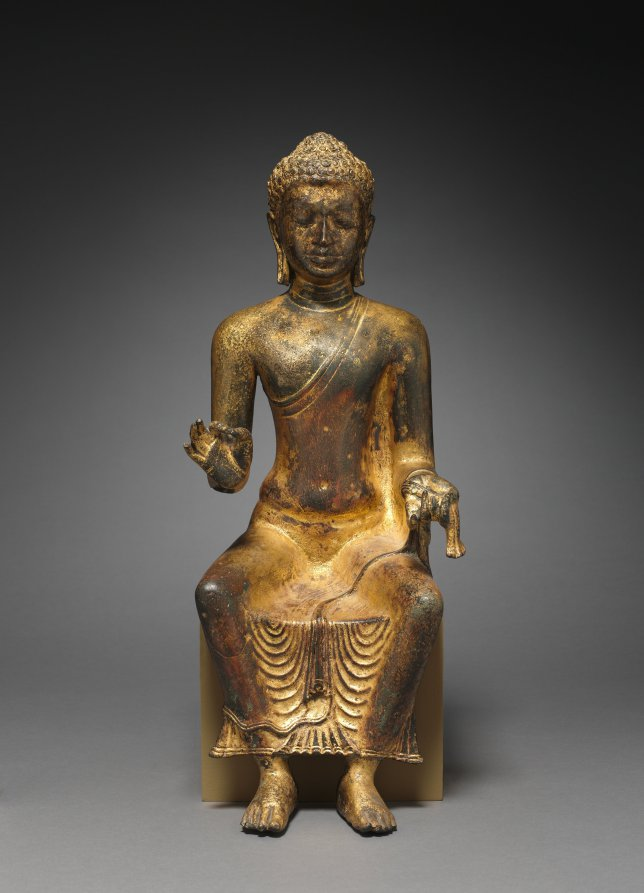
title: Enthroned Buddha Preaching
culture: Myanmar or Thailand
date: 700s–800s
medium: copper alloy with gilding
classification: Sculpture